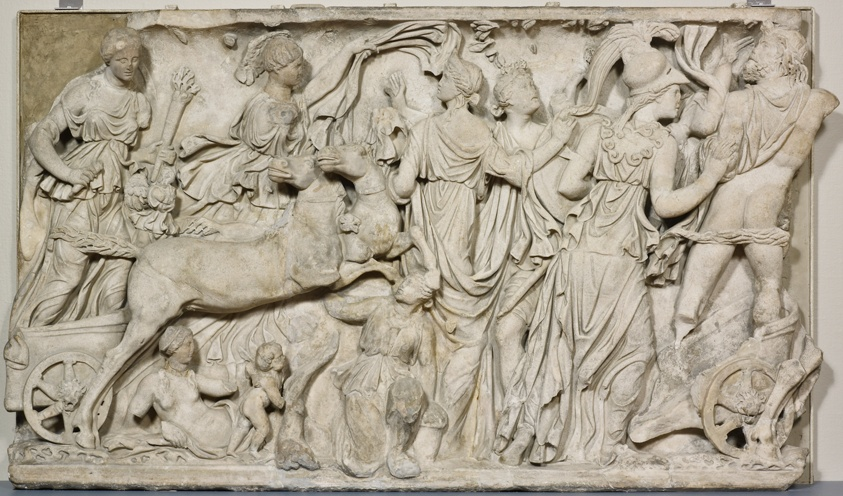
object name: Sculpture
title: Panel from a Sarcophagus Depicting the Abduction of Persephone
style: roman (ancient, style or period)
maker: Roman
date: 190-200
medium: Marble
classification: sarcophagus; sculpture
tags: underworld, Chariots, goddesses, gods (deities), horse